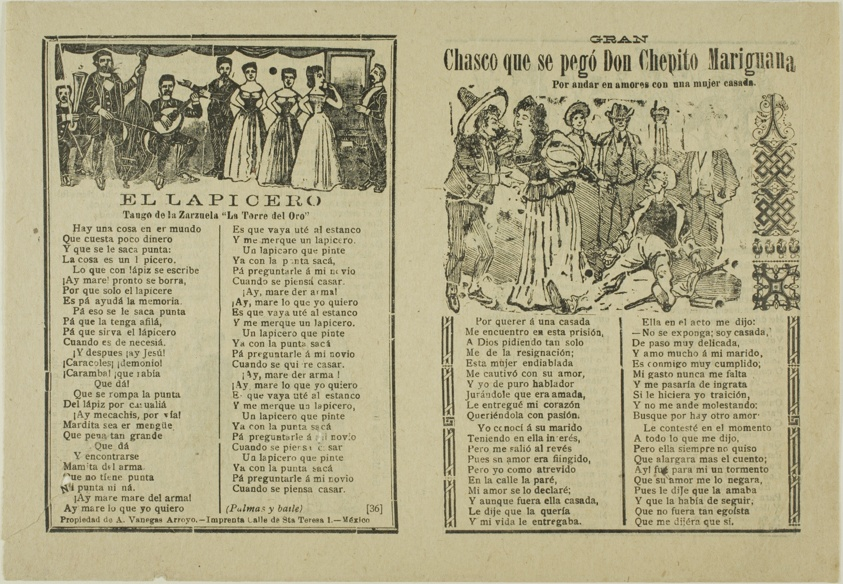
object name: Print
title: The Disappointment Suffered by Don Chepito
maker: José Guadalupe Posada (Mexican, 1852-1913)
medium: Relief engraving on zinc on paper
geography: Mexico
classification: relief etching; print; prints and drawing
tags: text